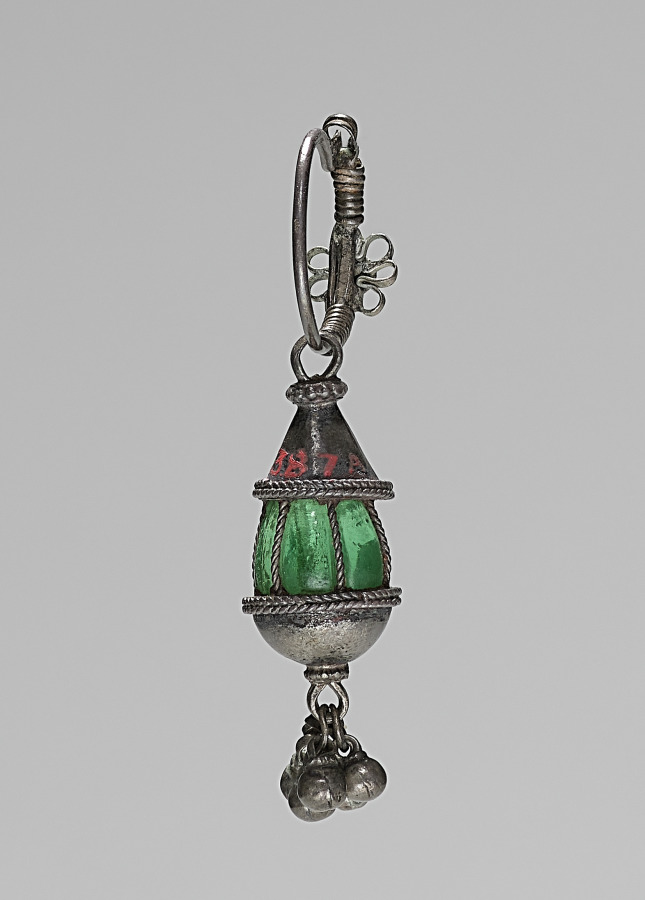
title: Earring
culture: India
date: 1800s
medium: silver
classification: Jewelry